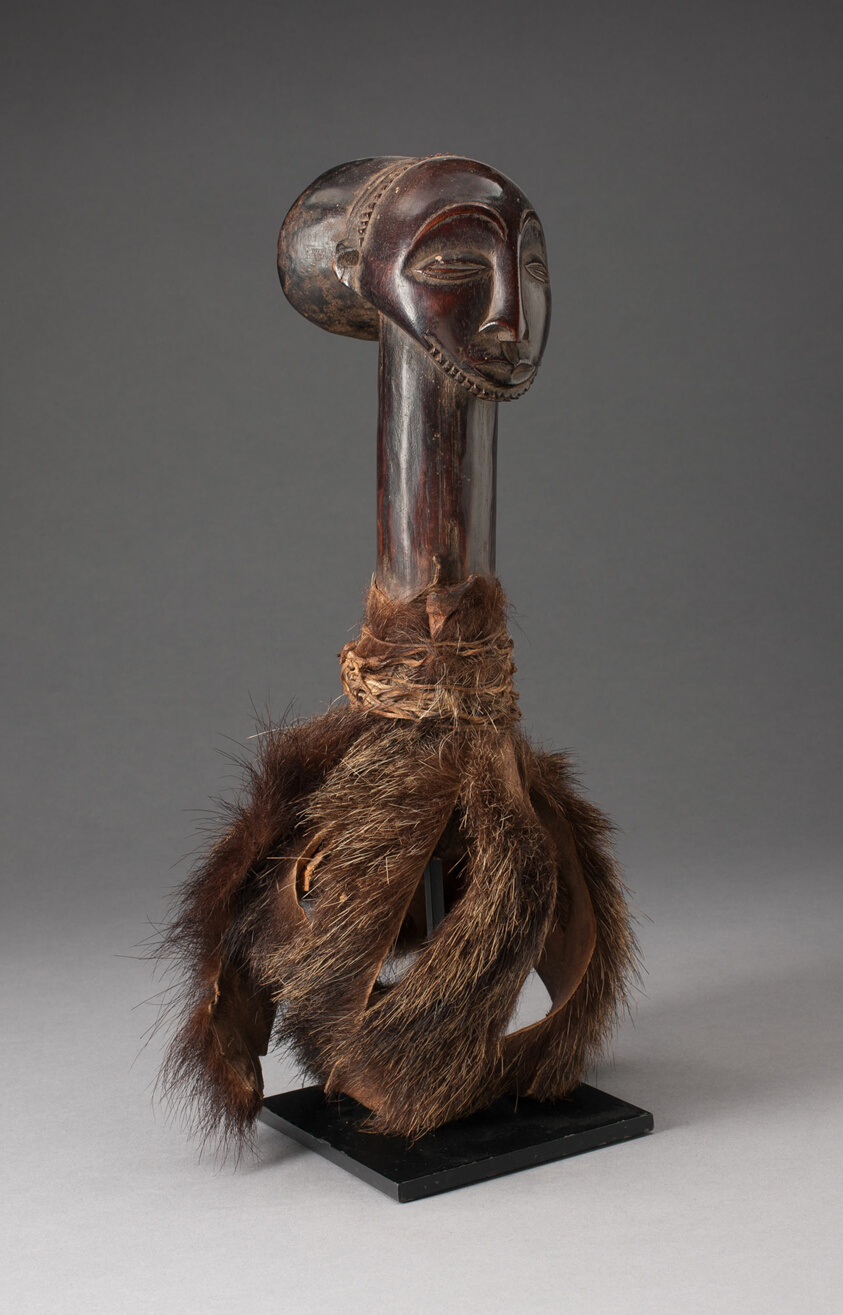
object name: Sculpture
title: Ritual Head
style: hemba, Arts of Africa, african Art, Central Africa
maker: Hemba; Democratic Republic of the Congo; Central Africa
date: Mid–/late 19th century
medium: Wood, animal fur (contemporary facsimile based on period examples), and twine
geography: Democratic Republic of the Congo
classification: sculpture; wood; arts of Africa; ceremonial object; african art; ritual objects